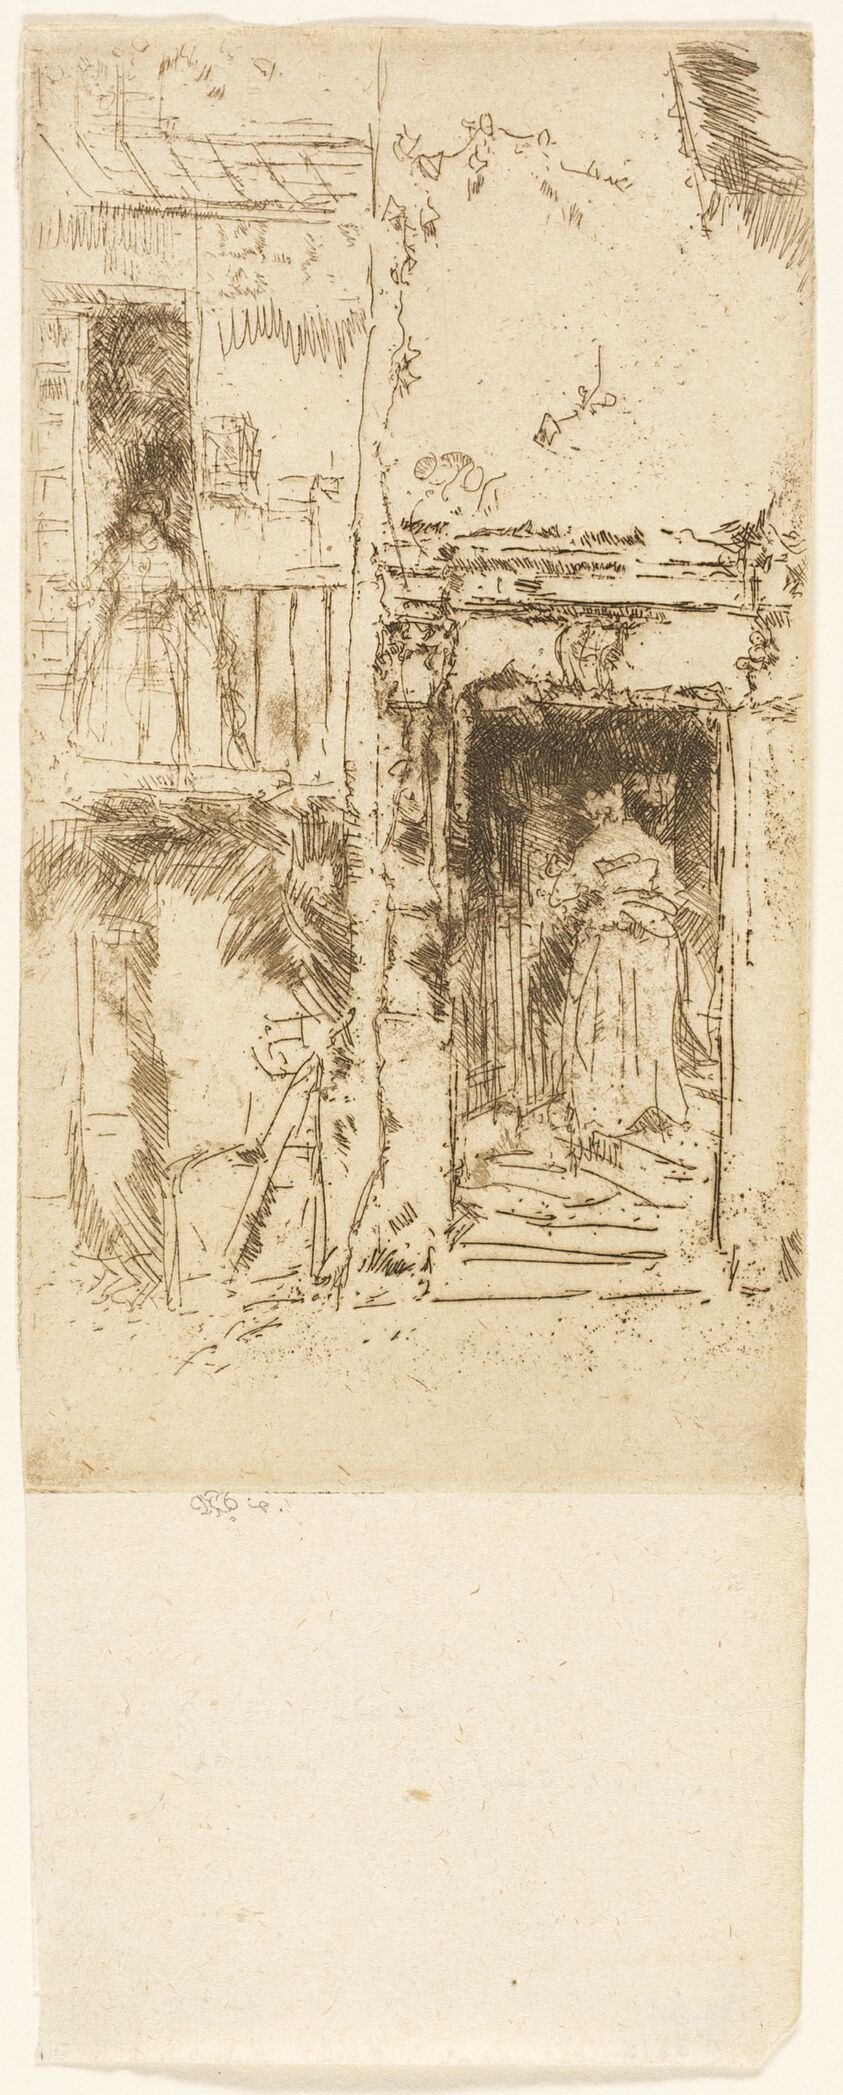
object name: Print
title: Doorway, Stables - Loches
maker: James McNeill Whistler (American, 1834-1903)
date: 1888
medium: Etching and drypoint with foul biting in brown ink on cream laid paper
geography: United States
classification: etching; foul biting; print; prints and drawing; paper; drypoint